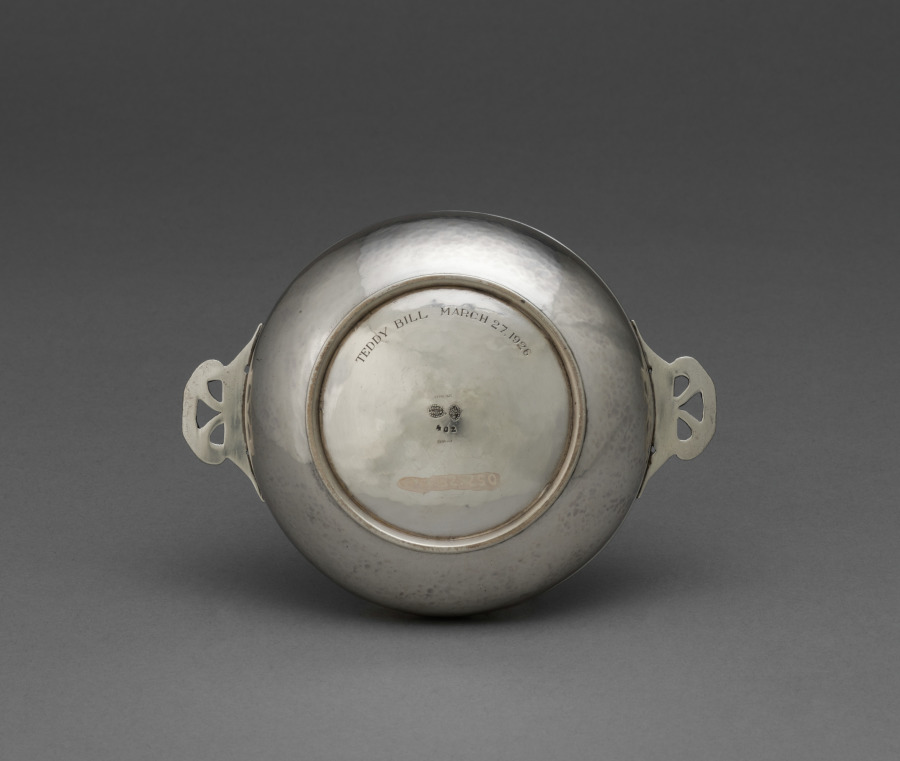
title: Bowl with Two Handles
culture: Denmark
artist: firm of Georg Jensen (Danish, 1866–1935)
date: c. 1925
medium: silver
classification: Silver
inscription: engraved on bottom: "TEDDY BILL MARCH 27, 1926."